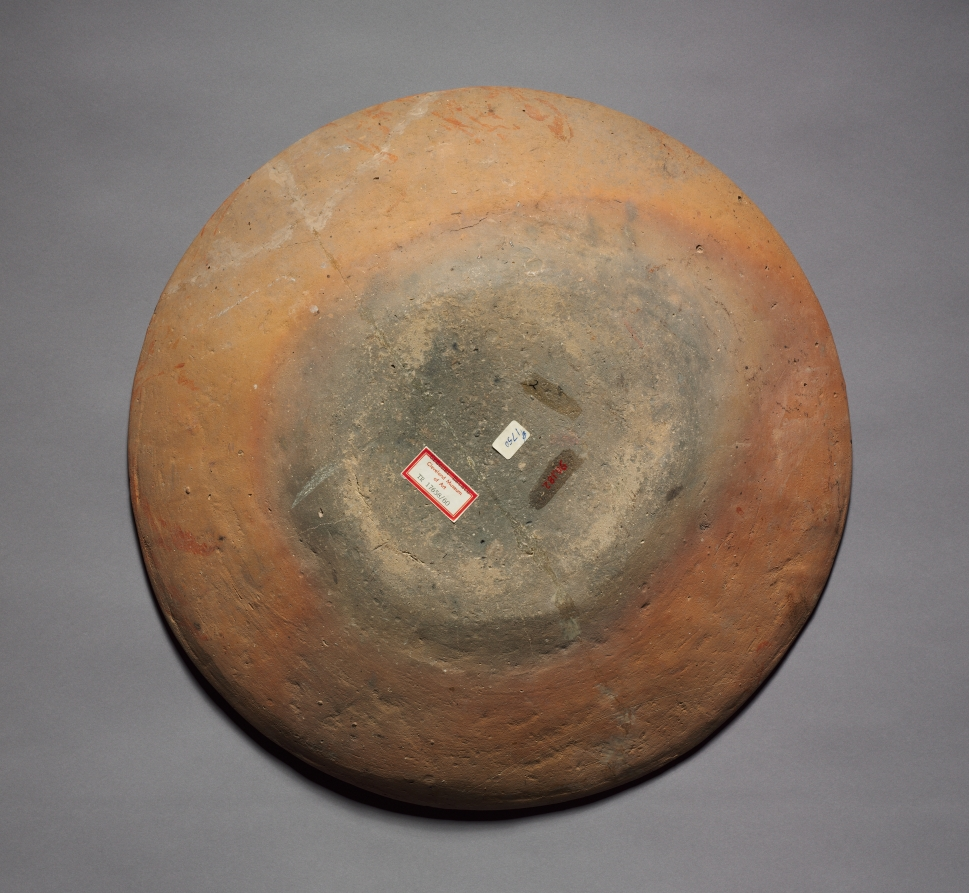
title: Plate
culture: Mexico, Campeche, Maya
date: c. 800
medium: earthenware with colored slips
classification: Ceramic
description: Its pose and jewelry suggest this flamboyantly painted figure may represent a human clad in the skin of a jaguar. Because the jaguar is the largest, most powerful predator in Mesoamerica, it was a natural metaphor for earthly and supernatural power alike.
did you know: Apex predators like jaguars are natural power metaphors.